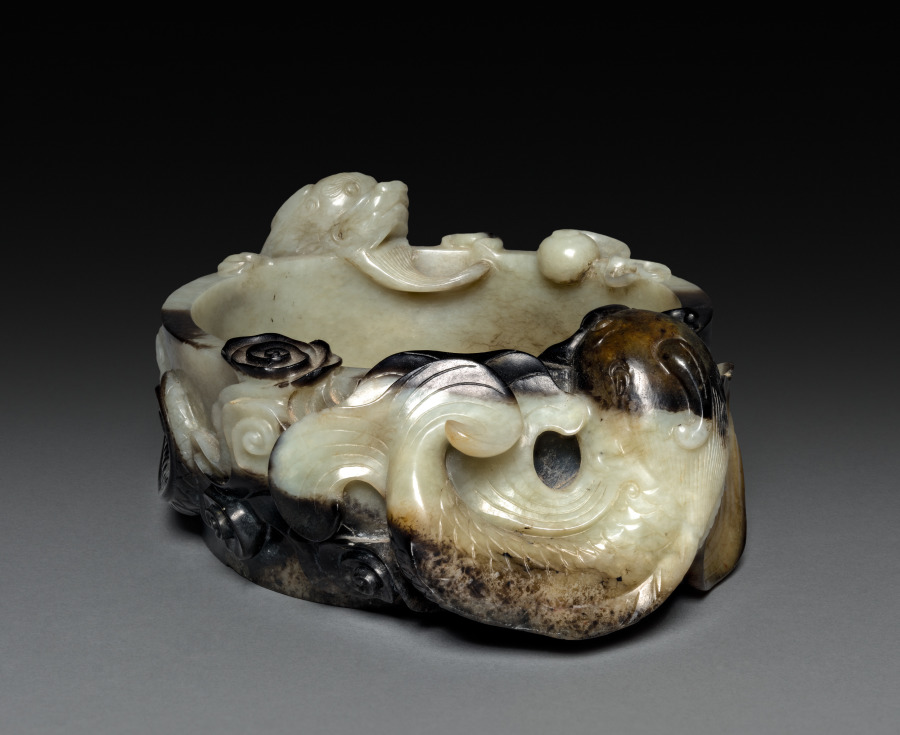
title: Dish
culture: China, Ming dynasty (1368–1644)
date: 1368– 1644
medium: jade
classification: Jade